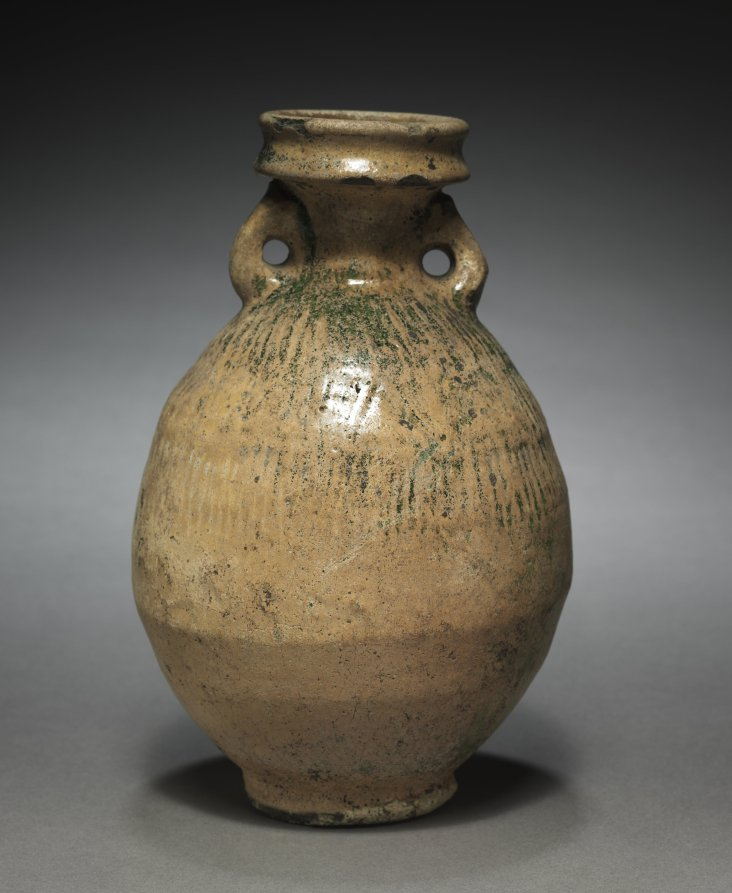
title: Ovoid Vase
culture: Parthian Empire (247 BCE–224 CE)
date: 1–200 CE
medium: terracotta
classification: Ceramic